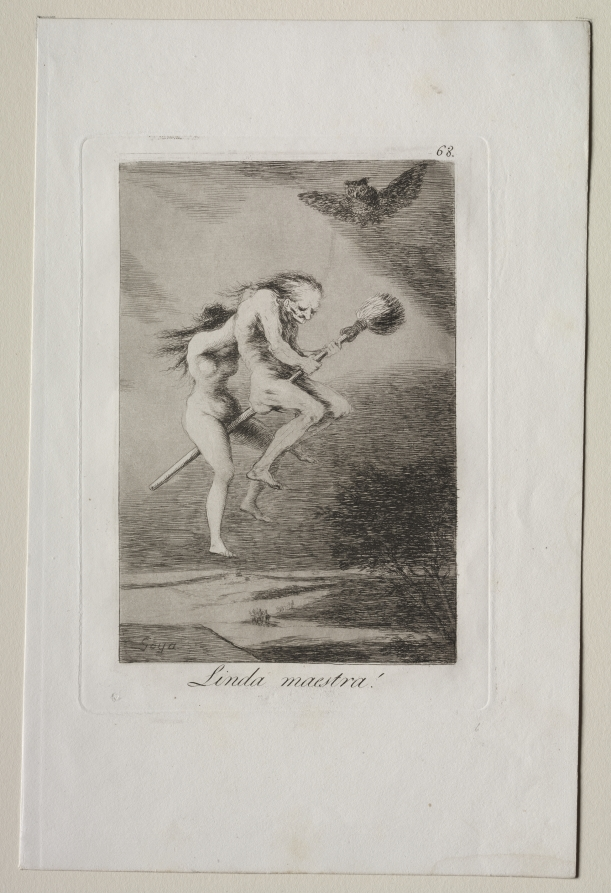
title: Pretty Teacher!, Plate 68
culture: Spain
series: Los Caprichos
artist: Francisco de Goya (Spanish, 1746–1828)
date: 1799 (printed c.1855)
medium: etching and aquatint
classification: Print